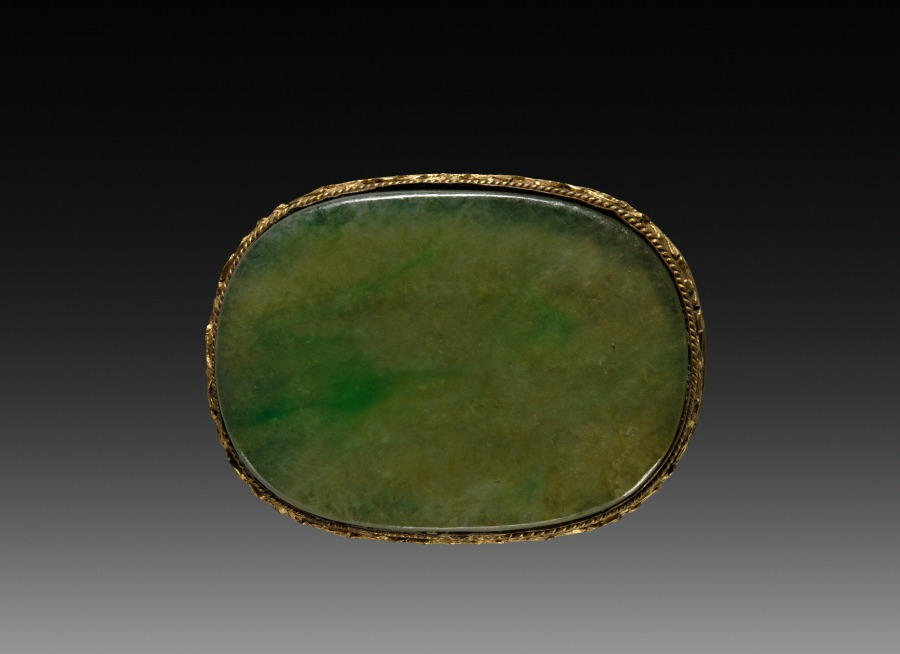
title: Buckle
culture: China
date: 1900s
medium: gilt brass set with green jade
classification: Jewelry